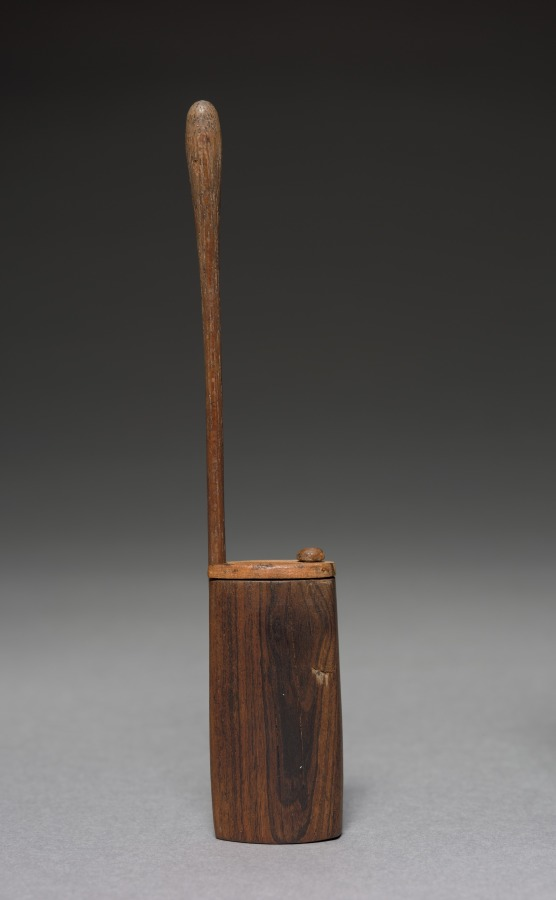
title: Kohl Container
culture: Egypt, New Kingdom (1540–1069 BCE), Dynasty 18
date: 1540–1296 BCE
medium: wood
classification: Cosmetic Objects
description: Cosmetic vessels would have once contained scented oils or ointments used for beautifying the body, while kohl containers held the eye paint seen in many depictions of ancient Egyptians. Galena, a mineral used in eye paint, helped reflect the sun and repelled insects and tiny organisms that could cause eye disease and blindness. Cosmetics were an essential element of daily life and associated with upholding the ancient Egyptians’ high standards of cleanliness.